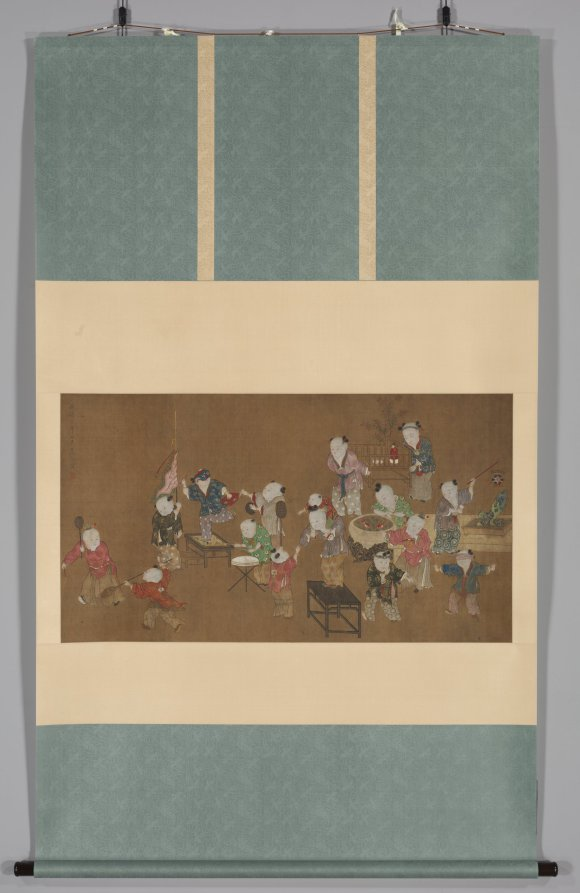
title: Children at Play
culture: China, Ming dynasty (1368–1644)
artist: Xia Kui (Chinese, active c. 1405–1445)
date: 1508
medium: hanging scroll; ink and color on silk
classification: Painting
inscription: 正德三年七月夏葵寫 [Zhengde san nian qi yue Xia Kui xie]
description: Sixteen children engage in scholarly, religious, and military activities, representing the popular “one hundred boys” theme expressing the wish for abundant, successful male offspring. Such paintings conveying auspicious wishes were often displayed during the New Year festival season. Two older boys wear small crowns with red tassels. Another child with a mask holds a brush in one hand, a rice measure in the other. He stands on a low table imitating Kuixing, the God of Examinations and servant to the God of Literature.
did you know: In the foreground on the right are three boys playing a kind of blind man’s bluff.